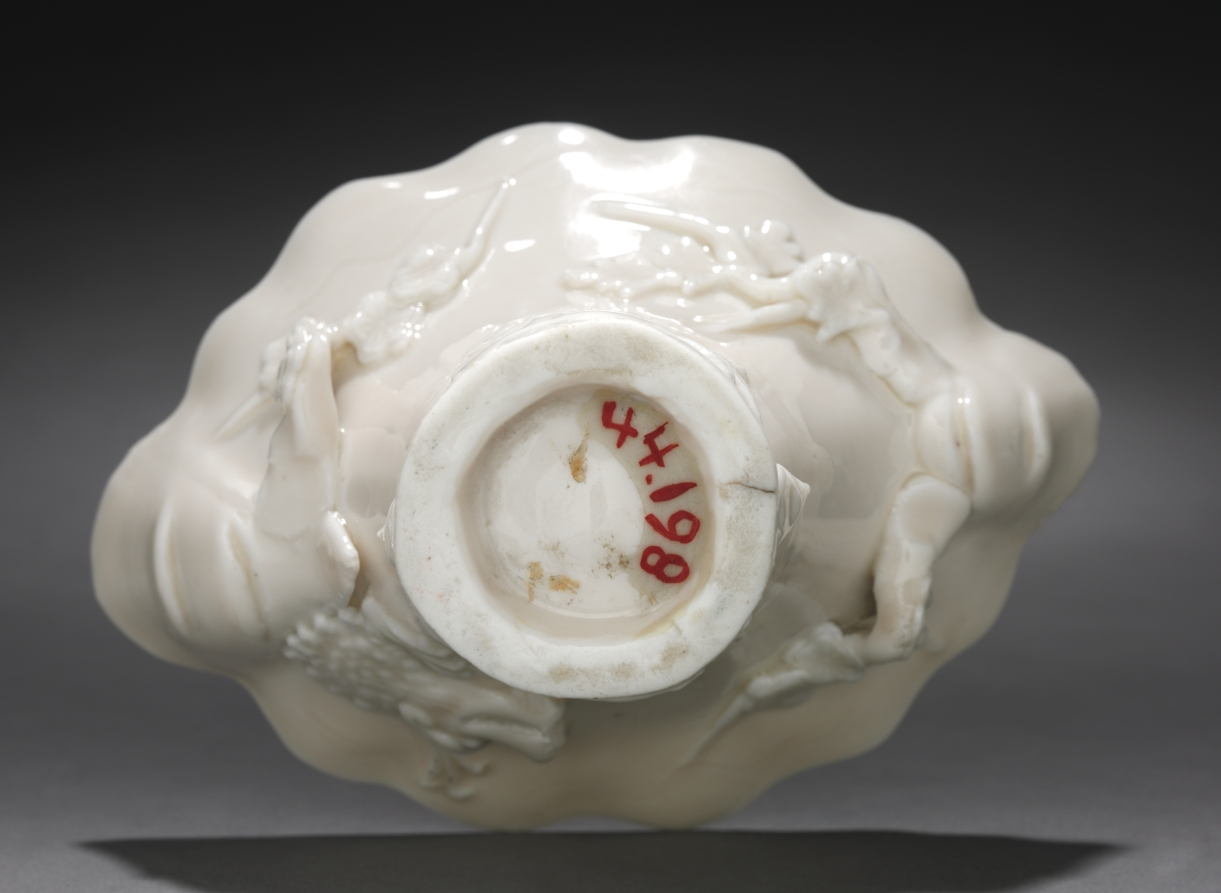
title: Libation Cup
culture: China, Qing dynasty (1644-1911), Kangxi reign (1661-1722)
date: 1662–1722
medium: porcelain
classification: Ceramic